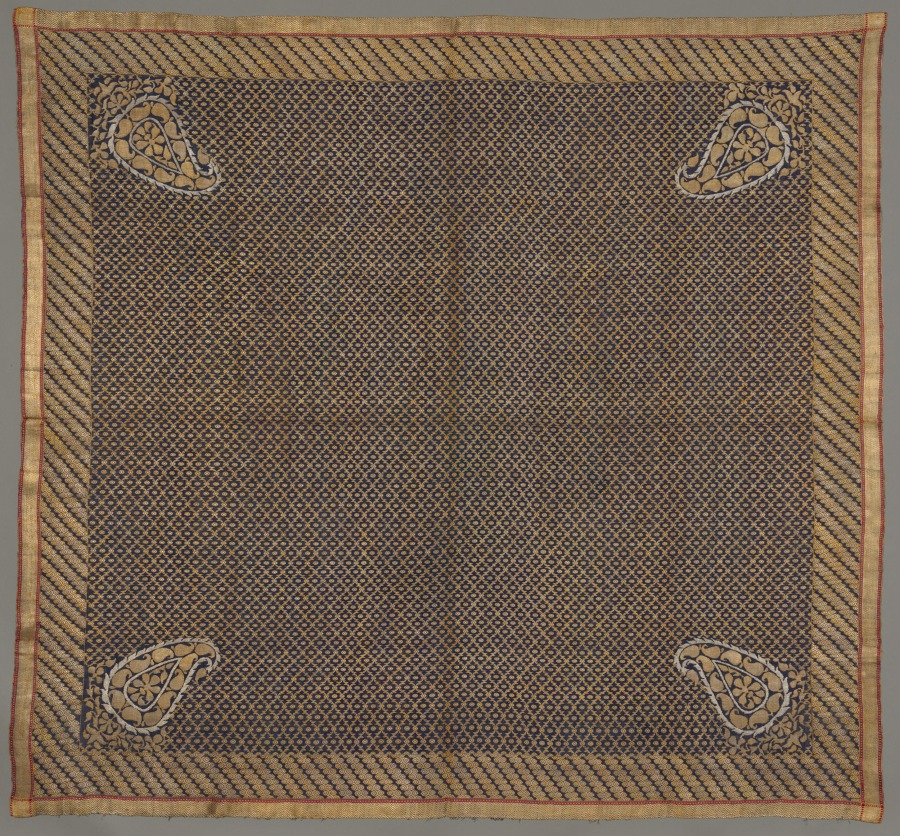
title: Fragment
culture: India, 19th century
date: 1800s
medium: brocade; silk, gold and silver threads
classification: Textile